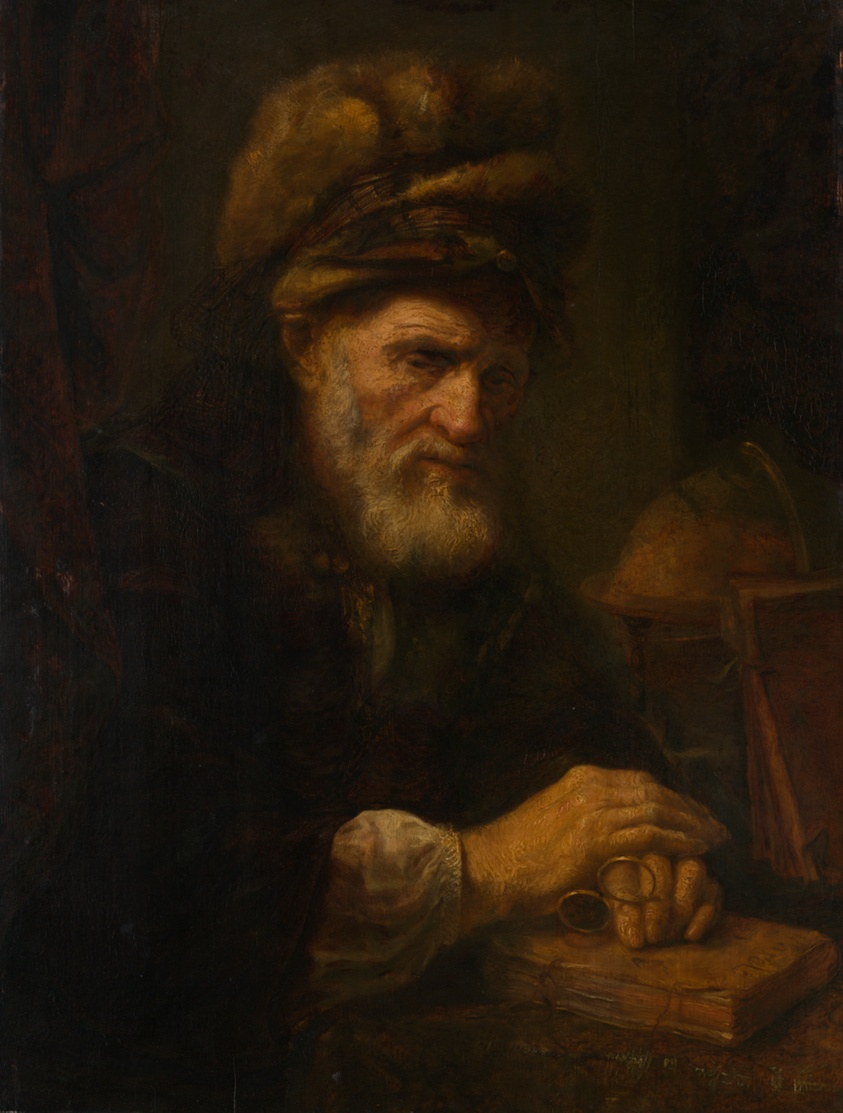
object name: Painting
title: An Old Man in a Fur Cap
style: 17th Century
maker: Karel van der Pluym (Dutch, 1625-1672)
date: c. 1655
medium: Oil on cradled panel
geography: Holland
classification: oil on panel; dutch; paint; oil paintings (visual works); portrait; painting; european painting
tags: man, portraits, portrait, interior, hat, globes, glasses, elderly, books, book, bearded man, Century of Progress, world's fairs, Chicago World's Fairs